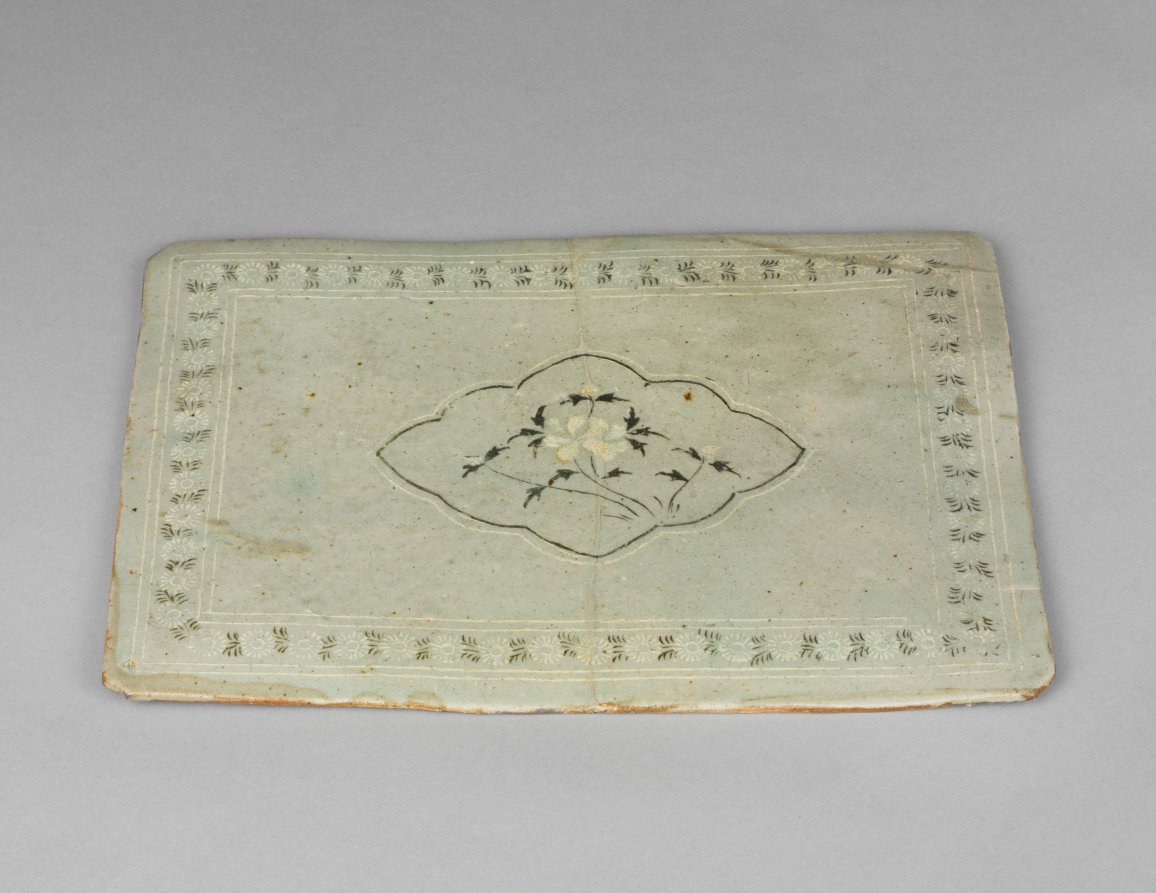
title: Plaque with Inlaid Peony and Chrysanthemum Design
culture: Korea, Goryeo dynasty (918–1392)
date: 1200s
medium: celadon with inlaid decoration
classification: Ceramic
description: Celadons, spoons, seals, and bronze mirrors were the most common burial objects in tombs during the Goryeo period (918-1392). Furnishing tombs with an elaborate assemblage of objects was believed to honor and comfort the newly dead. This type of celadon tile, elegantly adorned with the image of flowers such as bloomed peonies and chrysanthemums, was used to embellish the interior of buildings.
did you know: Celadon tiles such as this one were mainly produced in state kilns located in Kangjin and Buan, Jeolla province.